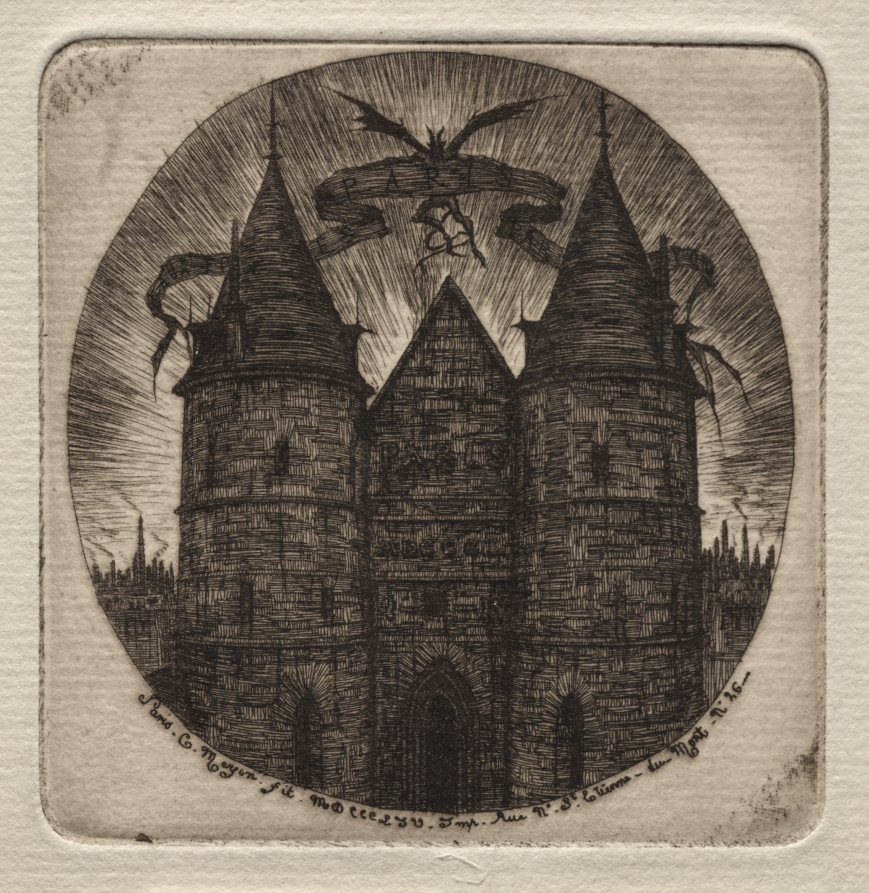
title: Etchings of Paris: Old Gate of the Palace of Justice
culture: France, 19th century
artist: Charles Meryon (French, 1821–1868)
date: 1854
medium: etching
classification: Print